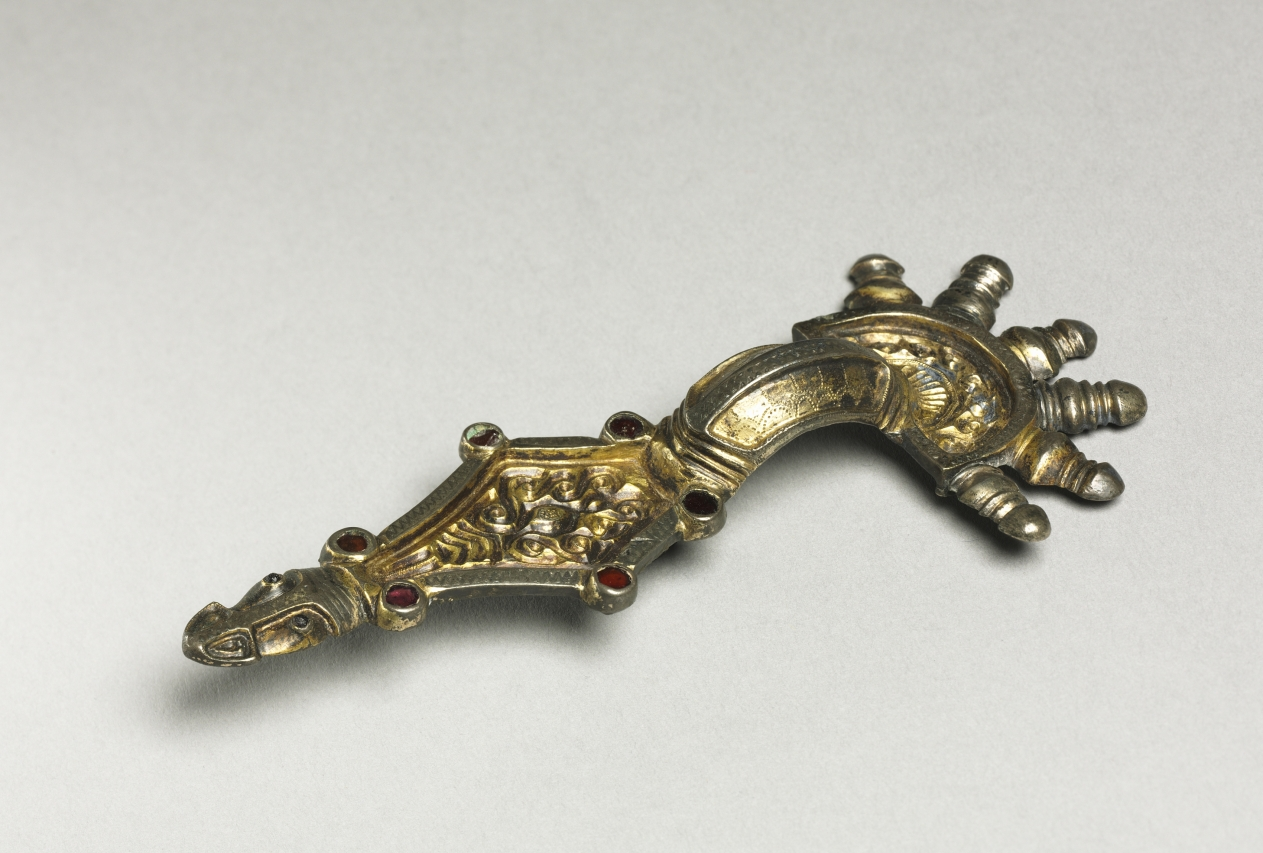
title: Fibula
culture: Ostrogothic, Migration period, 6th century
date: 500s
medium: gilt silver and garnets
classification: Jewelry